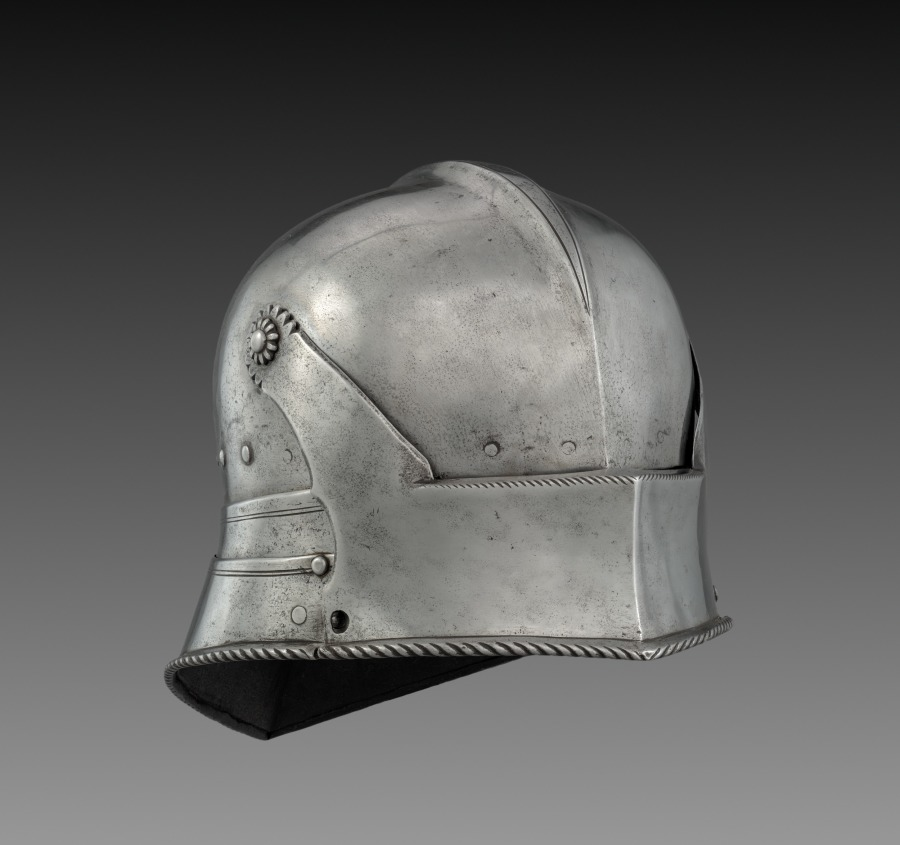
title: Visored Sallet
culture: Germany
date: c. 1490–1500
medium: steel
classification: Arms and Armor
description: The sallet is a partly open-face helmet common in Europe during the 1400s, used in both equestrian and infantry versions. Sallets with movable visors, like this example, are considered to be more technically and visually interesting; beautifully streamlined, it assumes a highly sculptural teardrop shape. Originally it would have been part of a complete suit of armor. The sallet became the quintessential helmet form of the late Middle Ages and is frequently represented in medieval miniatures and woodcuts.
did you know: Medieval sallets were design inspiration for modern-day fireman's helmets.